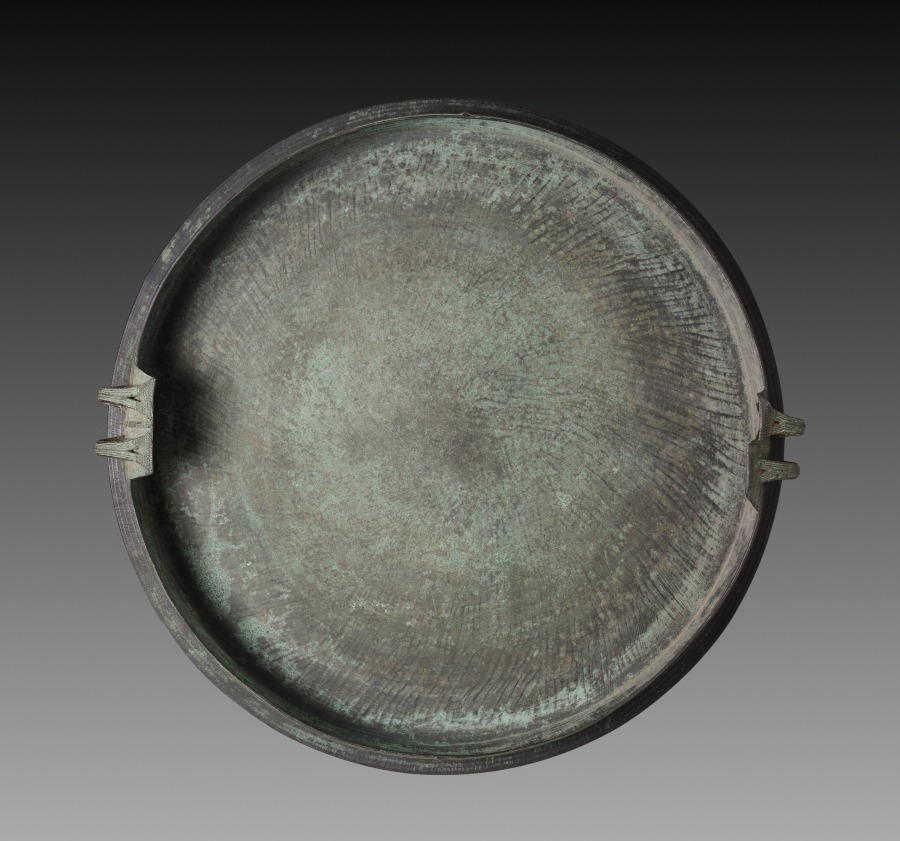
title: Dongson Drum Top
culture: Southeast Asia, Thailand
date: 300–400 CE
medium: bronze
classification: Metalwork